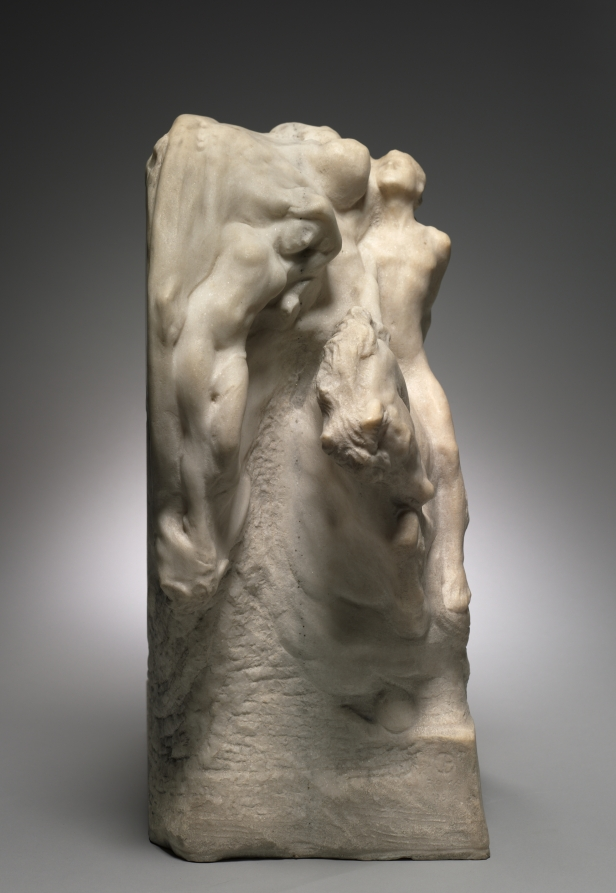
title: Dawn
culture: America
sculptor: Chester Beach (American, 1881–1956)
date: 1912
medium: marble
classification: Sculpture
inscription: Signed on side: CB (monogram) Roma 1912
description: Created while Chester Beach was living in Rome, Dawn features a nude man on horseback against a background of human forms emerging from a cloud of rolling mist. Although carved in the round from a block of marble, the sculpture has one primary view.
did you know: Chester Beach traded two of his sculptures to a farmer in Brewster, NY, obtaining land where he built his studio and a summer home.